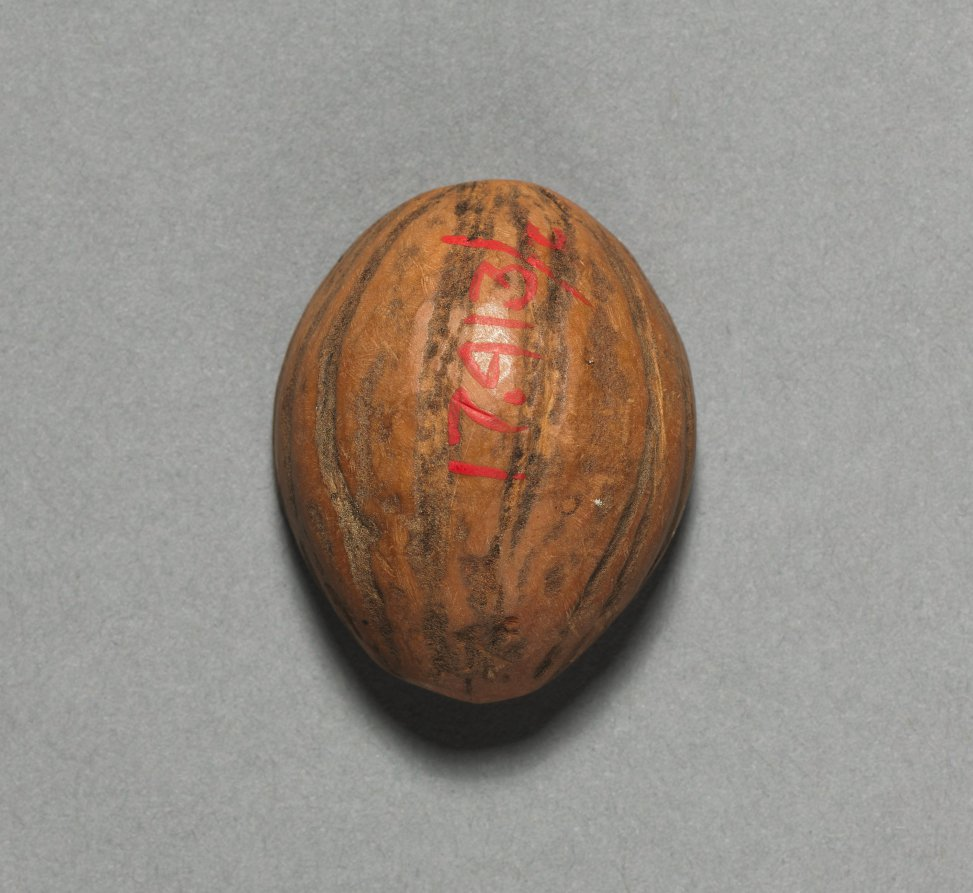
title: Gambling Dice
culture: California, Tulare, Unassigned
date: before 1917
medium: hollow shell, resin, glass beads, mica/seashell fragment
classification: Implements